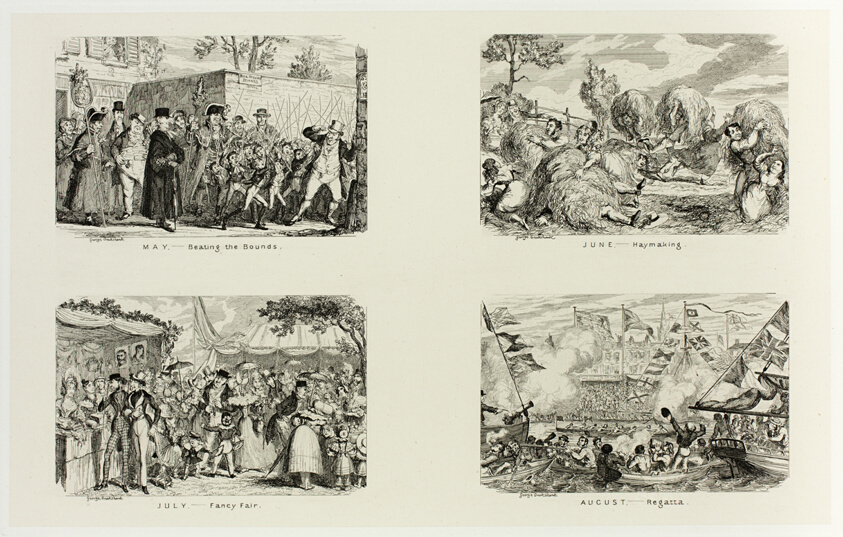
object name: Print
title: May – Beating the Bounds from George Cruikshank's Steel Etchings to The Comic Almanacks: 1835-1853 (top left)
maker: George Cruikshank (English, 1792-1878); published by Pickering & Chatto (English, 19th century)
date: 1837, printed c. 1880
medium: Four steel etchings in black on cream India paper, laid down on off-white card (chine collé)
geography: England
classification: etching; paper; print; prints and drawing